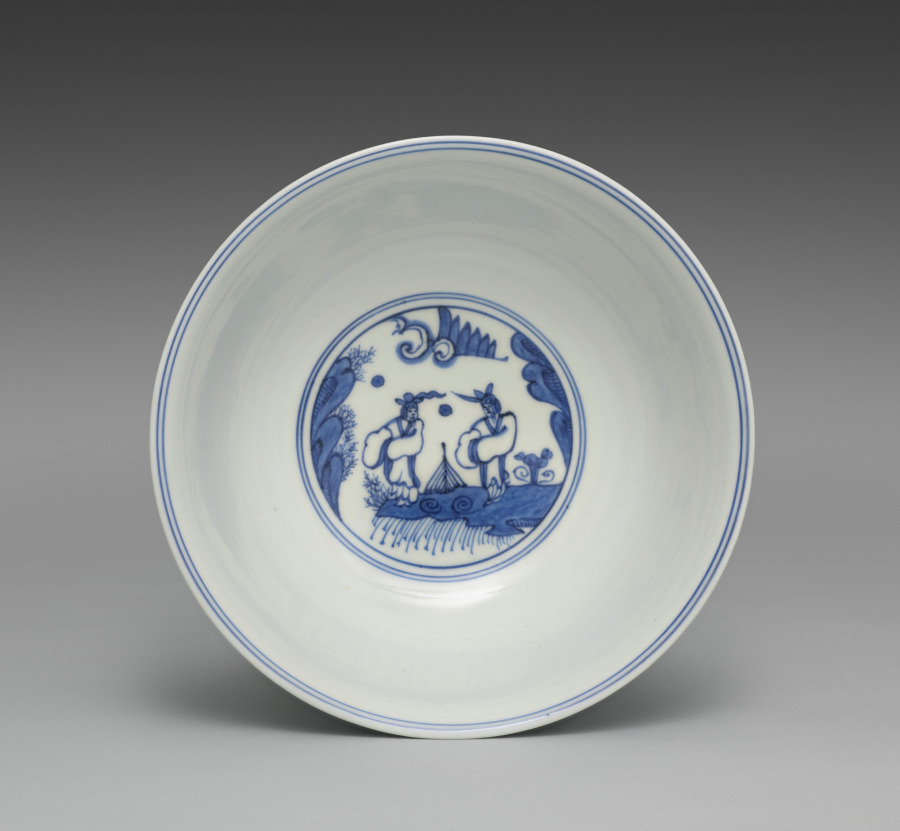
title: Bowl from Nesting Bowls with Daoist Immortals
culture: Japan, Meiji period (1868–1912)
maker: Seifū Yohei III (Japanese, 1851–1914)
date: 1893–1914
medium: Inner bowl from a set of three bowls; porcelain with underglaze blue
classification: Ceramic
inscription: 大日本清風造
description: Yohei III was capable of ink painting–like compositions in underglaze blue, as well as more decorative ones like that on this set of three nesting bowls. Bowls with very similar designs in five colors were produced in the reign of the Wanli emperor (reigned 1572–1620) during the Ming dynasty, and Yohei must have had direct access to one of these or to a close copy. A scene of Daoist immortals is presented on the bowls. On each one, the ground plane is defined with a blue wash. Four lanterns are evenly spaced around the bowl. Two are flanked with linked-piece metalwork banners of the seven treasures. The alternate altars are adorned with textile banners. In between them are four immortals, each standing beneath a tree with small plants surrounding his feet. Two of the immortals hold fruit on a tray. Another carries an elixir-filled ewer and a willow branch. The fourth holds a swastika (manji), here an auspicious symbol, and a flower. Curiously, the inscription inside each footring reads “Made by Seifu of Great Japan,” in emulation of the dynasty and reign inscriptions that appear on Chinese ceramics; however, one can also see through the translucent glaze another inscription, “Seifu Yohei,” written in large characters within a double band of blue on the largest bowl.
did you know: In the bottom of each bowl is a scene of two robed immortals who appear to stand on a precipice in a mountainous landscape high in the clouds, with celestial orbs over their heads.